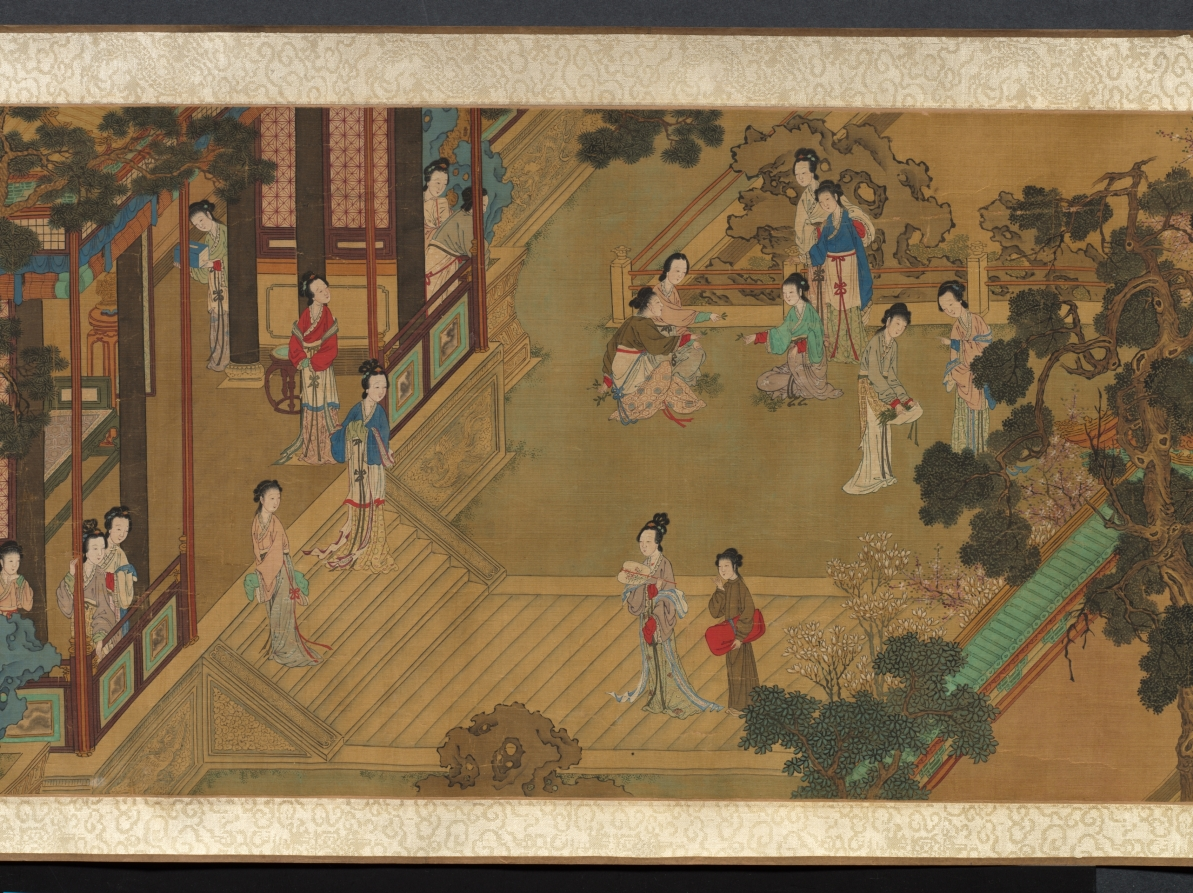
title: Palace Ladies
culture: China, Qing dynasty (1644-1911)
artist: copy after Qiu Ying (Chinese, 1494–1552)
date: 1644–1911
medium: handscroll, ink and color on silk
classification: Painting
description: This handscroll illustrates the pursuits of court ladies in a palace precinct on a spring day. Women, young girls, and their maids amuse themselves by sitting on a swing, playing games, watering and admiring peonies, performing music together, playing the qin (zither), feeding a parrot on the balustrade and fish in the water, or catching butterflies. The life of elite women was mostly restricted to the so-called inner quarters, meaning the garden and inner courts of the house. This painting idealizes the world of young palace girls that in fact was often filled with boredom and waiting for a lover.